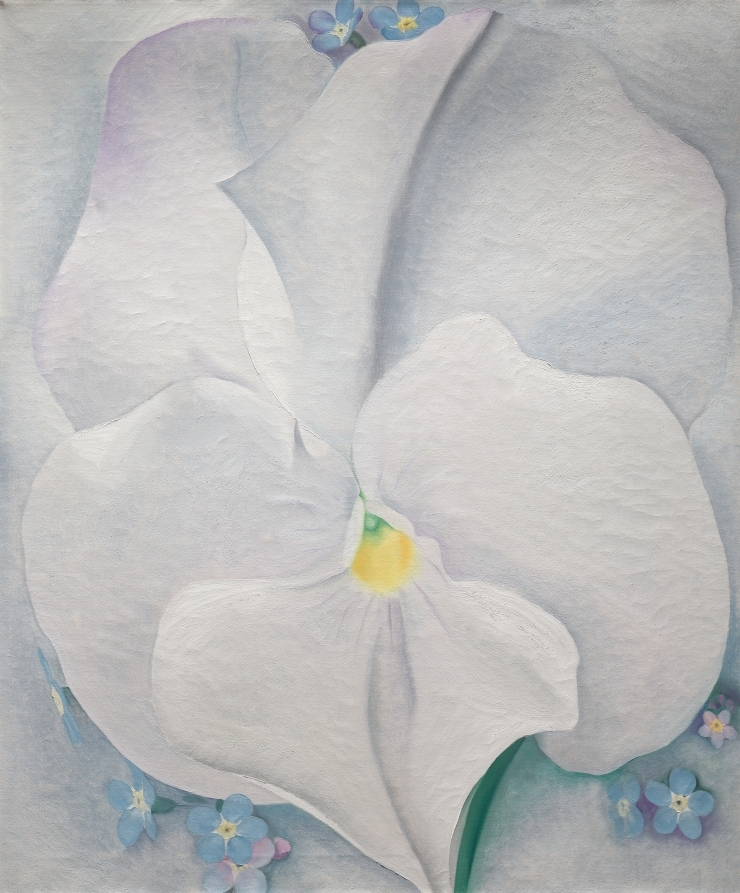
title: White Pansy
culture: America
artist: Georgia O'Keeffe (American, 1887–1986)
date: 1927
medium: oil on canvas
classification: Painting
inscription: Stretcher: "G [in circle] O'Keeffe" (GO, graphite) Backing: 1. OK * (graphite) [twice] 2. "White Pansy / 1927 / by Georgia O'Keeffe" [in oval] (AS, black crayon) 3. "Georgia O'Keeffe / 1927" (AS, graphite)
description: Among O'Keeffe's most admired works are her close-up images of flowers whose compositions border on abstraction. In this example, a large image of a white pansy is juxtaposed against much smaller blossoms of light blue forget-me-nots.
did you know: O'Keeffe displayed this painting above her living room couch before bequeathing it to the museum.